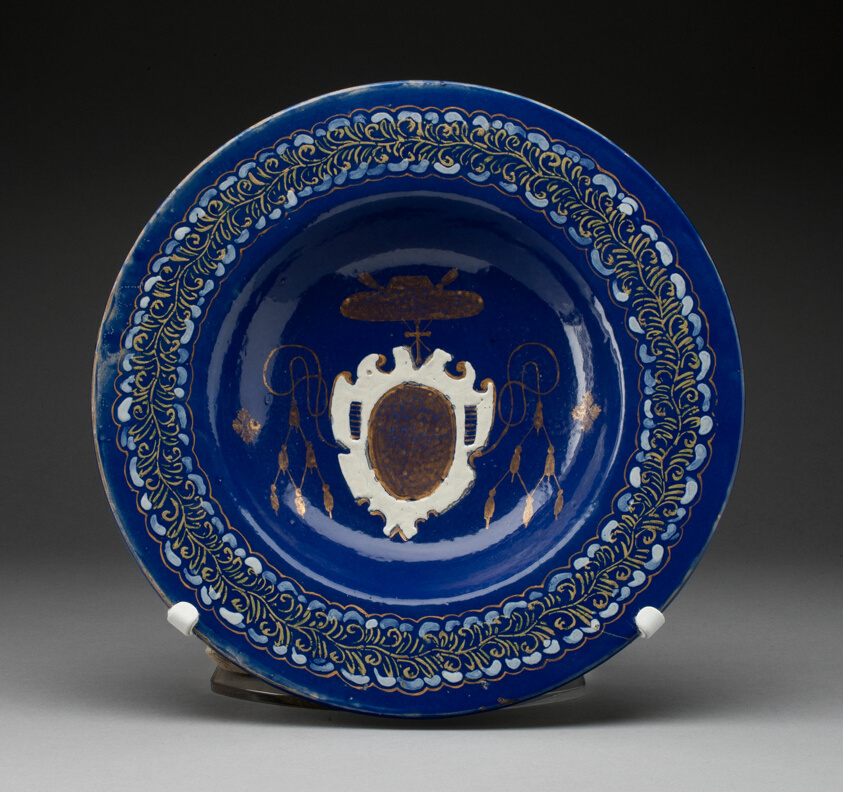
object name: Ceramics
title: Plate with (Effaced) Arms of an Ecclesiastical Patron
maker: Italian, Castelli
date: c. 1575/1600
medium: Tin-glazed earthenware with polychrome enamels and gilding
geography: Castelli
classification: earthenware; ceramics; european decorative arts; decorative arts